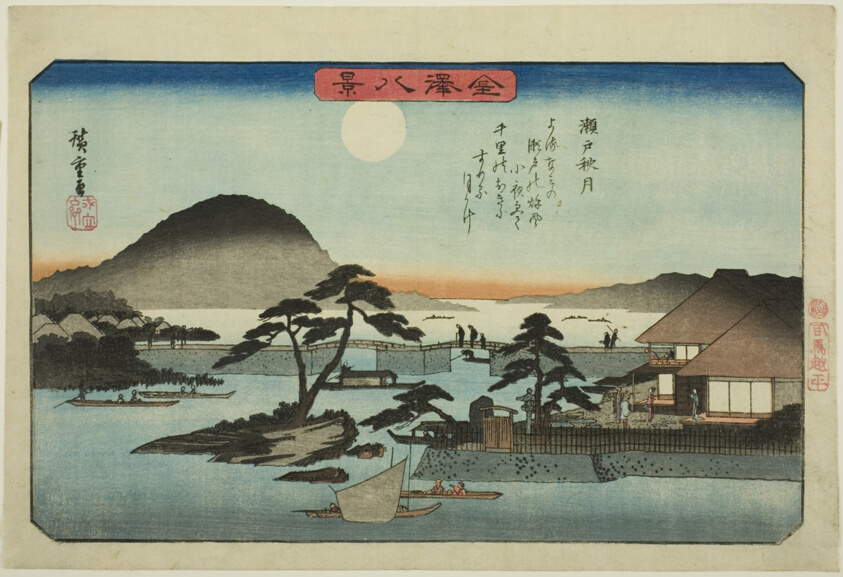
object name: Print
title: Autumn Moon at Seto (Seto shugetsu), from the series "Eight Views of Kanazawa (Kanazawa hakkei)"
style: Japanese (culture or style)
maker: Utagawa Hiroshige 歌川 広重; Japanese, 1797-1858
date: c. 1835/36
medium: Color woodblock print; oban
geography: Japan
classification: woodblock print; print; asian art